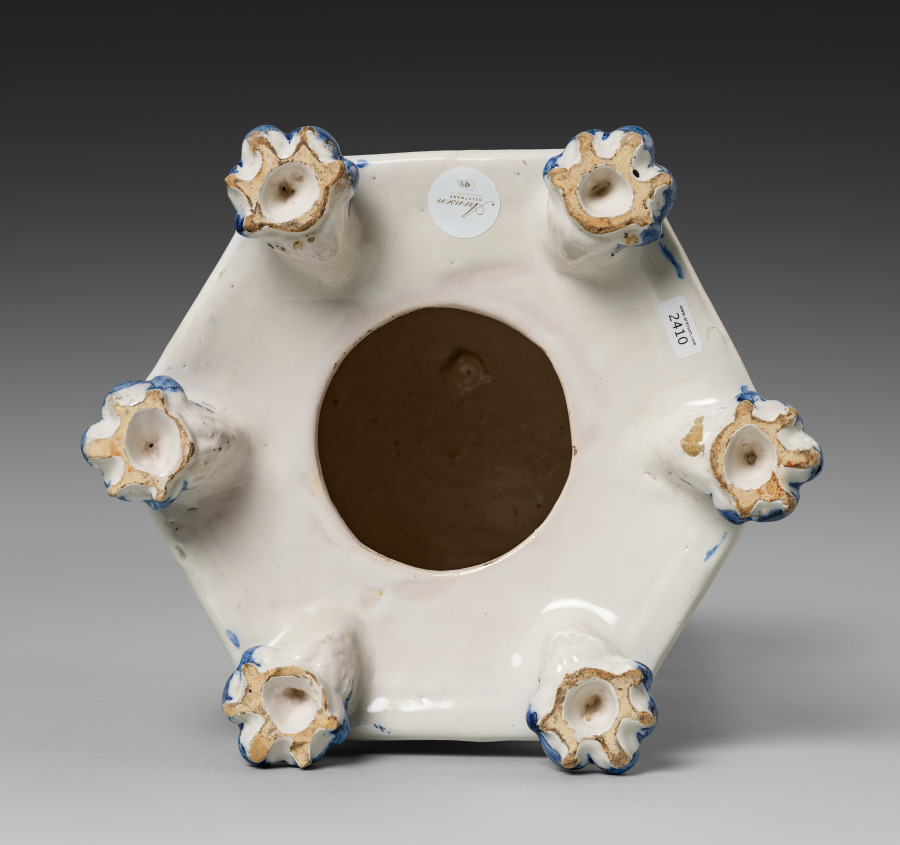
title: Base for a Flower Pyramid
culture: Netherlands, Holland, Delft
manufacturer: Adrianus Kocx (Dutch, active 1686–1701)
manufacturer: De Grieksche A (The Greek A) Factory (Netherlands, 1658–1811)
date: c. 1690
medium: Tin-glazed earthenware, painted in blue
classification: Ceramic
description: Allegorical figures representing Faith, Hope, and Love decorate the base of this pyramid, on which rest six tiers with spouts where flowers can be placed. Flower pyramids are among the most complex and luxurious types of ceramics produced in Delft in the late 1600s. This example was made in the Greek A Factory, owned by Adrianus Kocx. During his tenure, the factory became the most prestigious of Delft potteries and received commissions from Queen Mary II, who ruled over England, Scotland, and Ireland together with her husband, William III. She contributed to the international spread of the fashion for Delft ceramics.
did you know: The iconic blue-and-white ceramics from Delft originated as an attempt to copy Chinese porcelain.